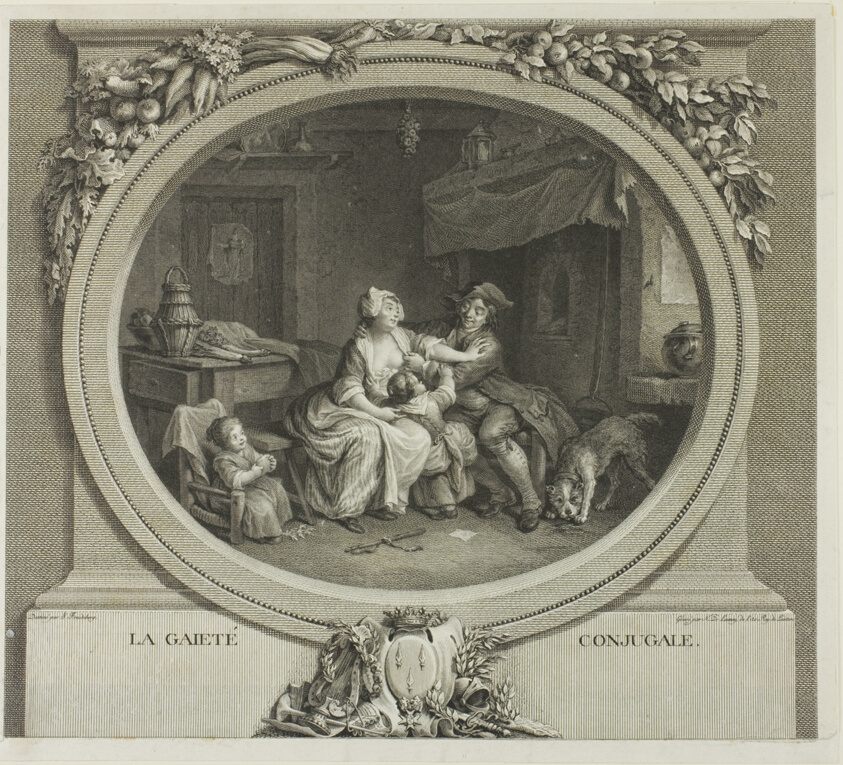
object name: Print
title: Conjugal Gaiety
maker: Nicolas Delaunay (French, 1739-1792); after S. Freudeberg (Swiss, 1745-1801)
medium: Etching and engraving in black ink on ivory laid paper, laid down on white laid paper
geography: France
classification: etching; print; prints and drawing